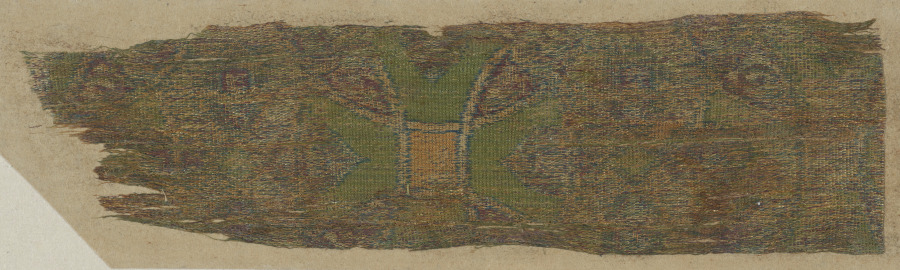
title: Fragment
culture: China or Japan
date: 700s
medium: compound twill weave, silk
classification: Textile